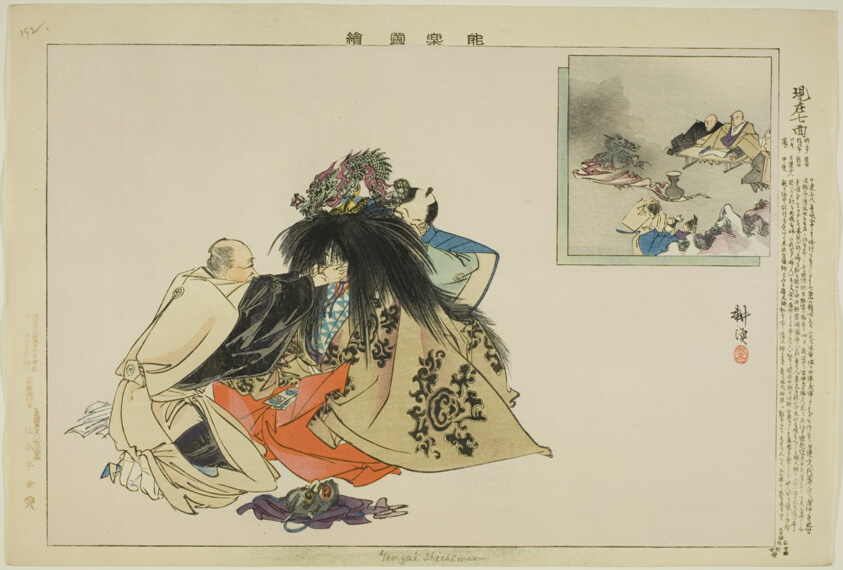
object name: Print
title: Genzai Shichimen, from the series "Pictures of No Performances (Nogaku Zue)"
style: Japanese (culture or style)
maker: Tsukioka Kogyo; Japanese, 1869-1927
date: 1898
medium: Color woodblock print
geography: Japan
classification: woodblock print; print; asian art